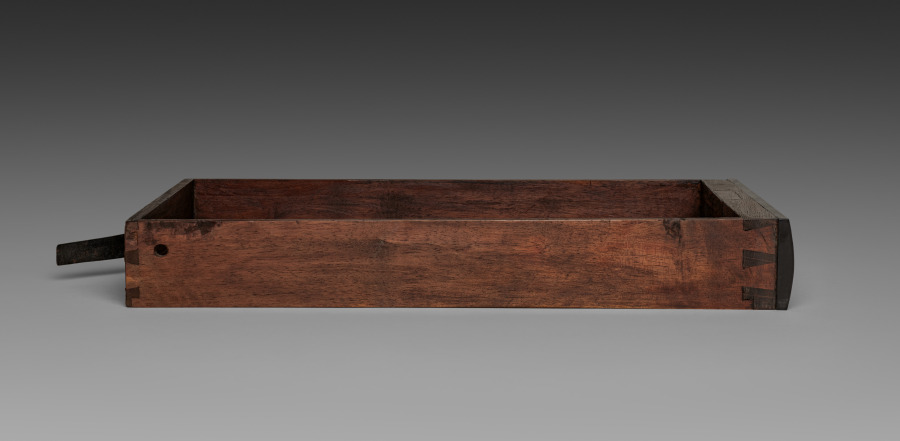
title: Drawer for Cabinet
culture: France, late 17th Century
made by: André-Charles Boulle (French, 1642–1732)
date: c. 1690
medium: ebony, marquetry in metal and tortoiseshell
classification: Furniture and woodwork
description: Appointed cabinetmaker to King Louis XIV in 1672, André-Charles Boulle became a master of furniture making in France during the late 1600s until his death in 1732. Known primarily for his use of marquetry, in which metal patterns are inlaid into tortoiseshell then applied within the veneered surface of the furniture, Boulle established a level of quality and craftsmanship few others could achieve. As a result, his work found favor at the royal court and among other aristocrats and diplomats eager to impress the king. The inclusion of a medallion depicting Louis XIV within the bronze decoration of this chest would have identified the owner with the royal court. Often exhibiting stout architectural proportions with elegant groups of inlaid motifs such as the parrot on the central panel of this chest, Boulle’s designs are an example of the intellectual fashion for contrasting ideas, materials, and motifs.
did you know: Originally designed to sit atop an elaborate tall stand, this chest was likely altered in the late 1700s to reduce its scale and height.